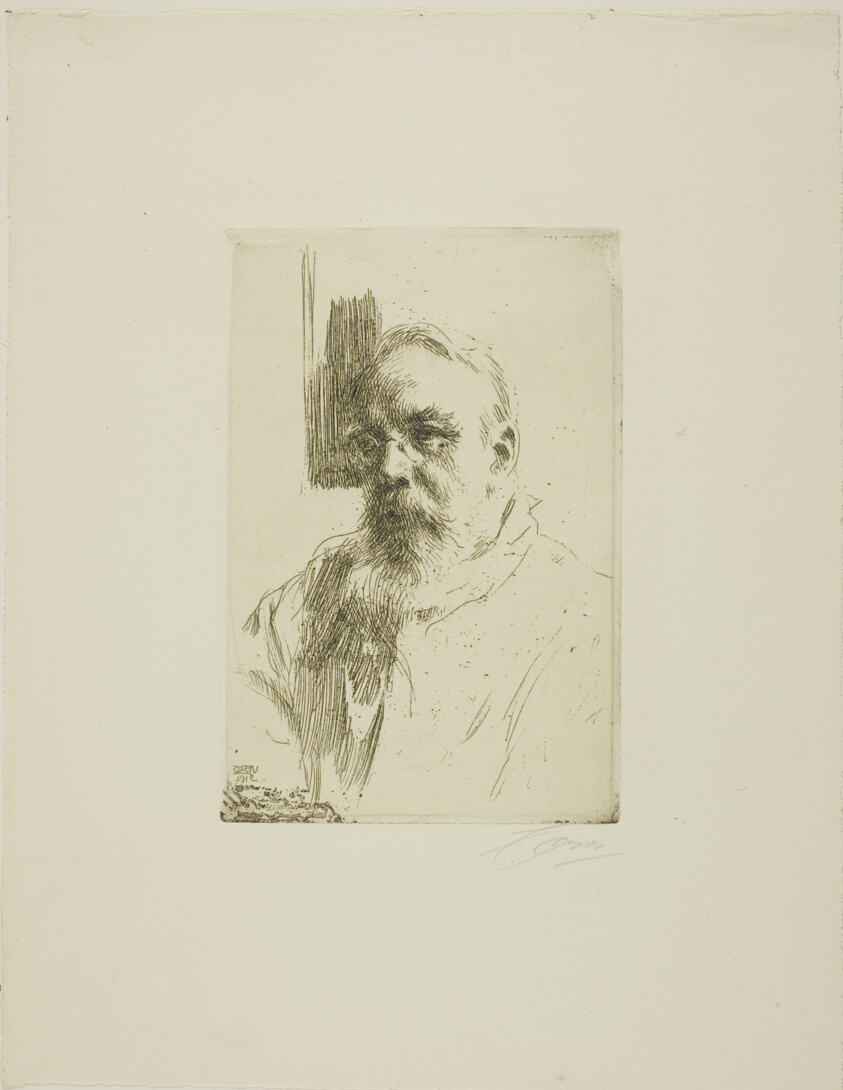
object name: Print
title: Professor John Berg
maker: Anders Zorn (Swedish, 1860-1920)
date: 1912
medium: Etching on ivory laid paper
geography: Sweden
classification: etching; print; prints and drawing